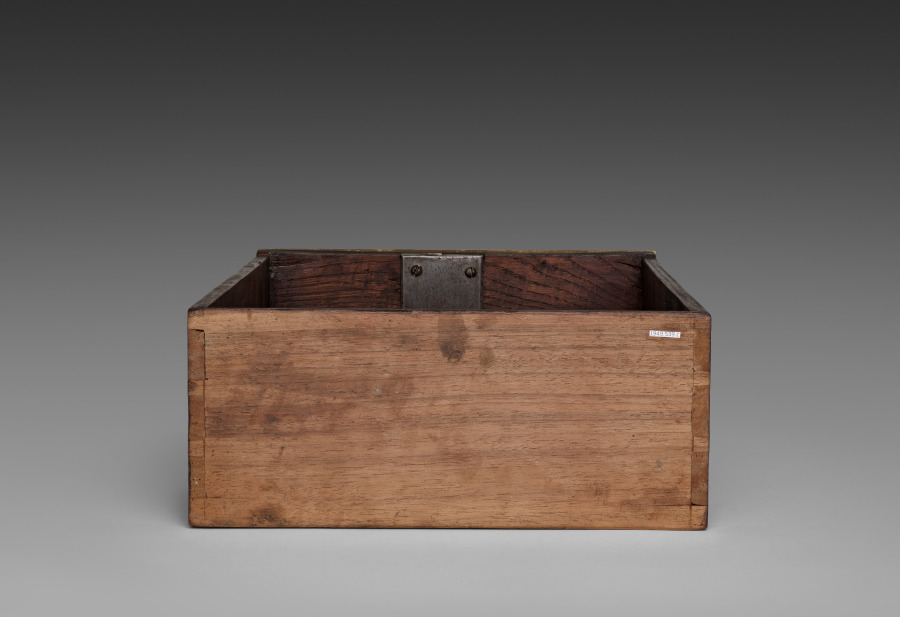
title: Side Drawer for Cabinet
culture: France, late 17th Century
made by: André-Charles Boulle (French, 1642–1732)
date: c. 1690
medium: ebony, marquetry in metal and tortoise shell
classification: Furniture and woodwork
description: Appointed cabinetmaker to King Louis XIV in 1672, André-Charles Boulle became a master of furniture making in France during the late 1600s until his death in 1732. Known primarily for his use of marquetry, in which metal patterns are inlaid into tortoiseshell then applied within the veneered surface of the furniture, Boulle established a level of quality and craftsmanship few others could achieve. As a result, his work found favor at the royal court and among other aristocrats and diplomats eager to impress the king. The inclusion of a medallion depicting Louis XIV within the bronze decoration of this chest would have identified the owner with the royal court. Often exhibiting stout architectural proportions with elegant groups of inlaid motifs such as the parrot on the central panel of this chest, Boulle’s designs are an example of the intellectual fashion for contrasting ideas, materials, and motifs.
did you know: Originally designed to sit atop an elaborate tall stand, this chest was likely altered in the late 1700s to reduce its scale and height.